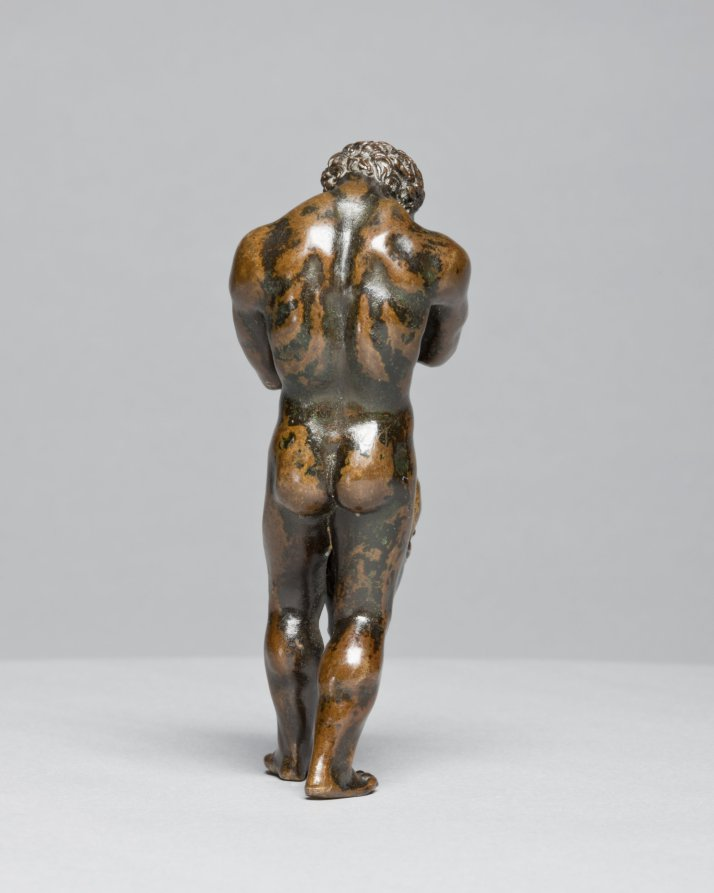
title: Hercules and the Nemean Lion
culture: Italy or France, 16th century or later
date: 1500s or later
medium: bronze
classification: Sculpture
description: The original owner of this work would have understood that this scene referred to the entire story of Hercules, the demi-god who had to accomplish twelve labors. The lion is named after the city of Nemea, near Corinth, a monstrous beast sent by the goddess Hera to wreak havoc on the area. After killing the lion, Hercules wore his pelt, commonly seen in other representations of the hero.